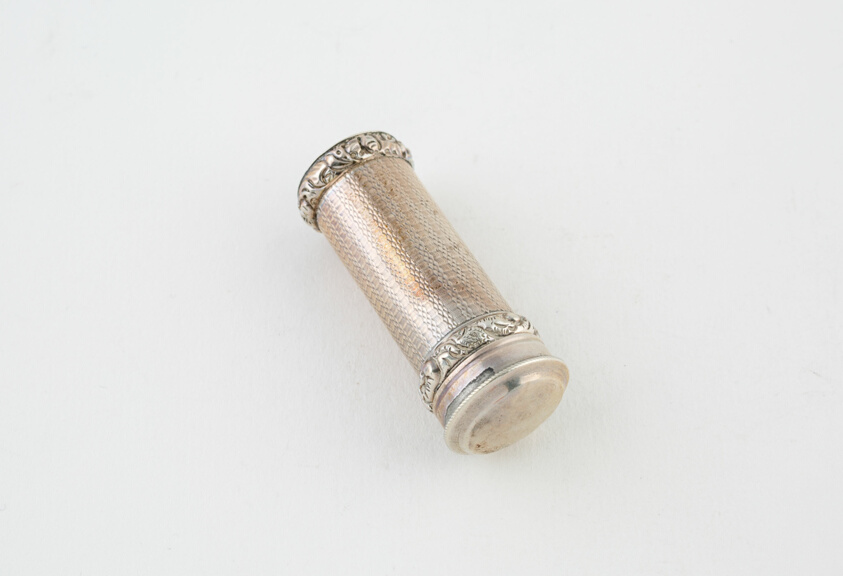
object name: Metalwork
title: Game Counter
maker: Possibly Birmingham, England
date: c. 1820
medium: Silver, bloodstone, sardonyx, and agate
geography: Birmingham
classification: container for personal use; box; game; games; european decorative arts; metalwork; silver; decorative object/ornament